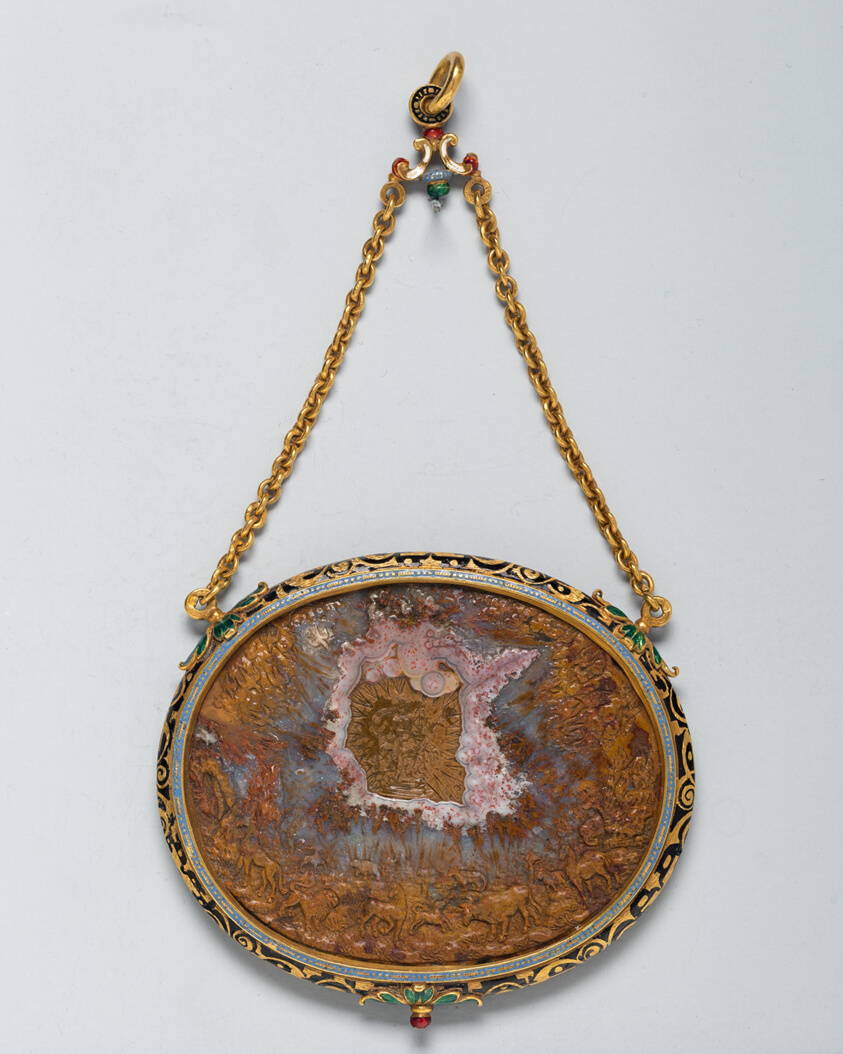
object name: Costume and Accessories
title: Pendant with a Cameo of Orpheus Charming the Animals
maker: Italian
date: c. 1550-c. 1600 (cameo); 19th or 20th century (mount)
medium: Chalcedony, gold, and enamel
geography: Europe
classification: pendant (jewelry); jewelry; european decorative arts; costume